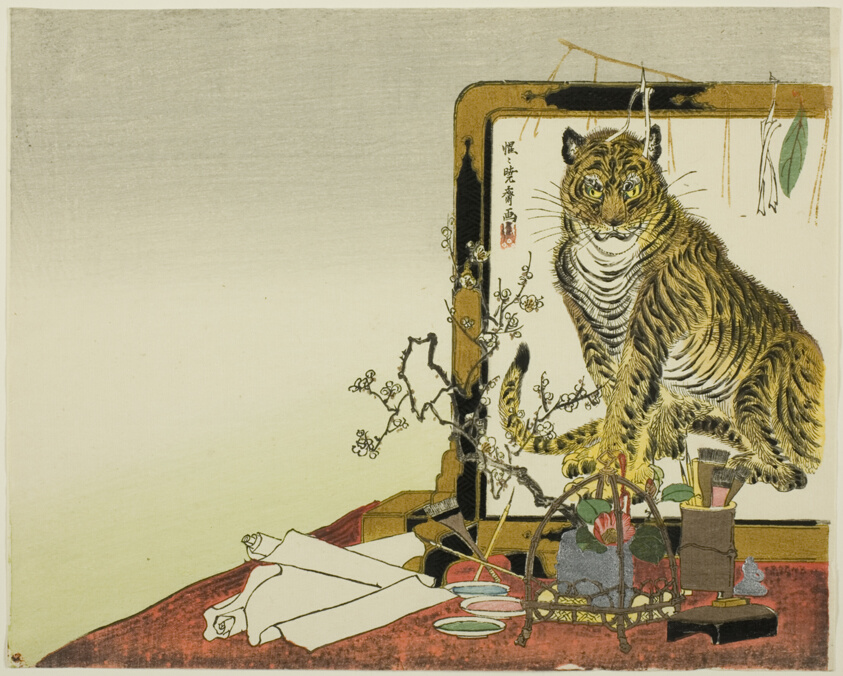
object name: Print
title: Standing Screen (Tsuitate) of a Tiger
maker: Kawanabe Kyosai; Japanese, 1831-1889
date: 1878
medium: color woodblock print; surimono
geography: Japan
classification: woodblock print; print; asian art